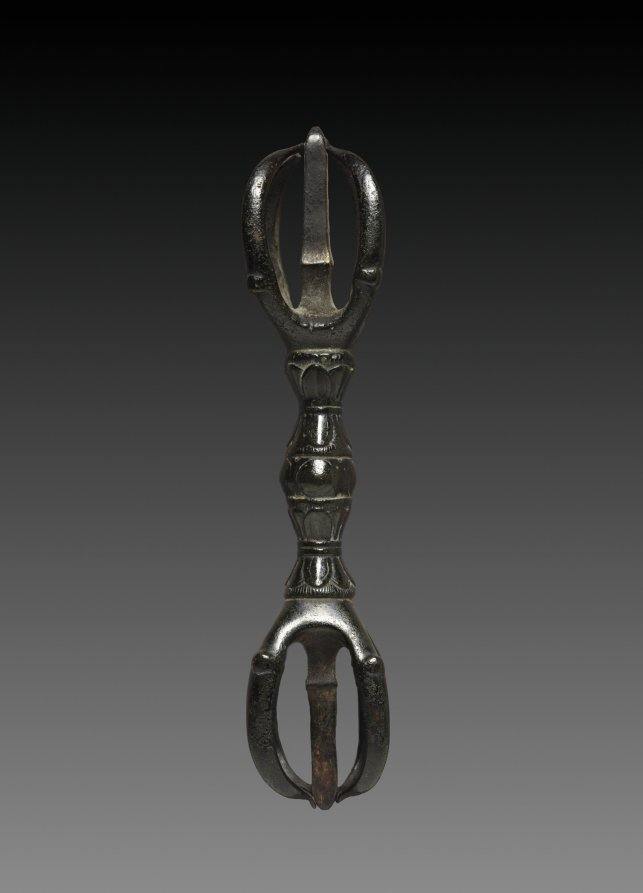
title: Five-pronged Vajra Pestle (Gokosho)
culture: Japan, Heian period (794–1185)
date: 900s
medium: bronze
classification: Metalwork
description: Resembling weapons wielded by deities described in the Vedas, ancient Indian religious scriptures, the vajra pestle (kongōsho) has long been used in Esoteric Buddhist rituals. The word vajra means diamond and thunderbolt in Sanskrit. Vajras are thus indestructible and powerful tools of Buddhism. The number of prongs has significance, with single-, three-, and five-pronged vajras being used for different purposes. The stylized thunderbolt known as a vajra also connotes the speed of lightning and the indestructible qualities of diamond to best describe the attributes of Tantra. Vajras are ubiquitous in tantric art and ritual practices. This example from the Heian period (784-1185) reveals the early spread of Tantra from India across China and Southeast Asia to enter Japan where it is known as Shingon. A Japanese monk named Kūkai founded the Shingon sect of Esoteric Buddhism after he received the texts and teachings from a Chinese tantric master. When he returned to Japan in 806, he founded the influential Shingon sect.